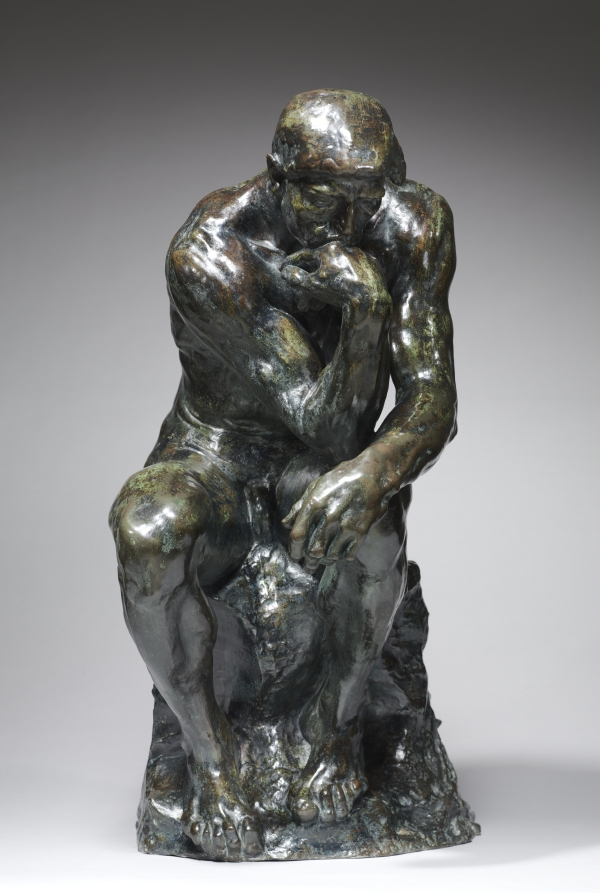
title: The Thinker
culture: France, 19th century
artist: Auguste Rodin (French, 1840–1917)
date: c. 1880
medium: bronze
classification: Sculpture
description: Rodin originally conceived The Thinker as a depiction of the Italian poet Dante Alighieri (1265–1321) sitting in the upper center of a monumental sculptural doorway titled The Gates of Hell (below). Inspired by Dante’s description of a journey through the underworld in his epic poem The Divine Comedy (about 1320), The Thinker contemplates mankind’s fate while gazing at a host of damned figures writhing in anguish below. Stripped of clothing, the figure’s rippling muscles convey an inner, animating life force symbolic of mental activity or creative effort. The figure leans forward, as if ready to spring from his perch, yet seems simultaneously caught in the inaction of deep thought. Rodin produced independent versions of The Thinker, first in this original size and later in a monumental version.